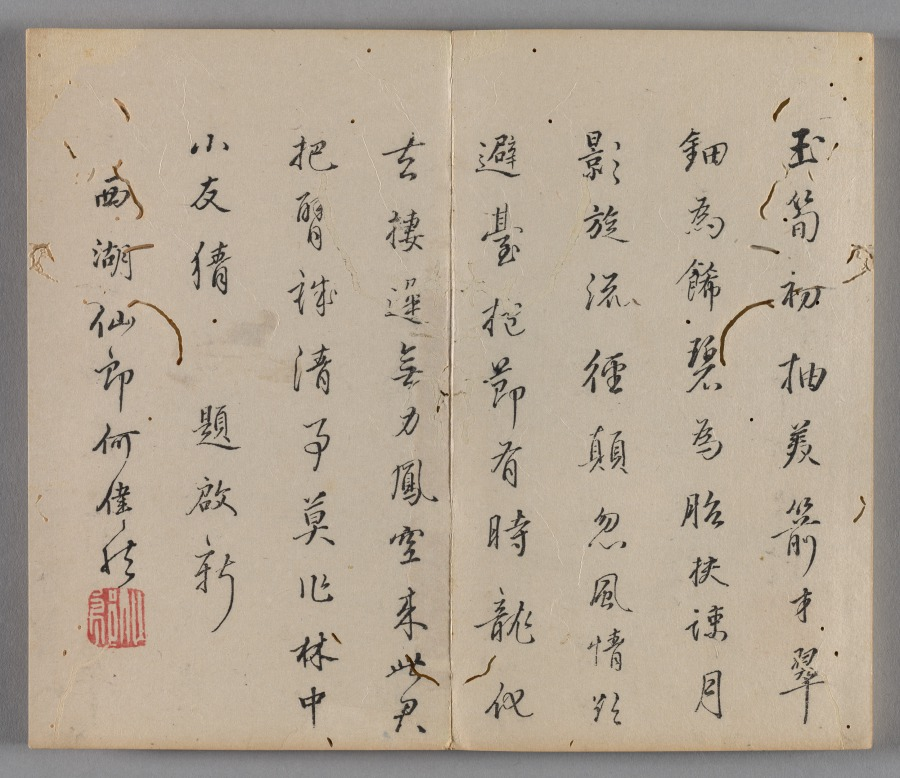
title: Ten Bamboo Studio Painting and Calligraphy Handbook (Shizhuzhai shuhua pu): Bamboo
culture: China, Qing dynasty (1644-1911)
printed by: Hu Zhengyan (Chinese, c. 1584–1674)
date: 1633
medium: Woodblock-printed book; ink and colors on paper; first edition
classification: Print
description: Color printing reached a level of perfection in the early 1600s, as seen in this Ten Bamboo Studio Collection of Calligraphy and Painting and the Mustard Seed Garden Manual of Painting (printed 1679 and 1701). The painterly quality, precision in registering (aligning) the woodblocks, and harmonious colors made them the most successful color print editions in Chinese history. Both editions were printed and compiled in Nanjing, spread nationwide, and had a great impact on the arts in Japan and Korea.